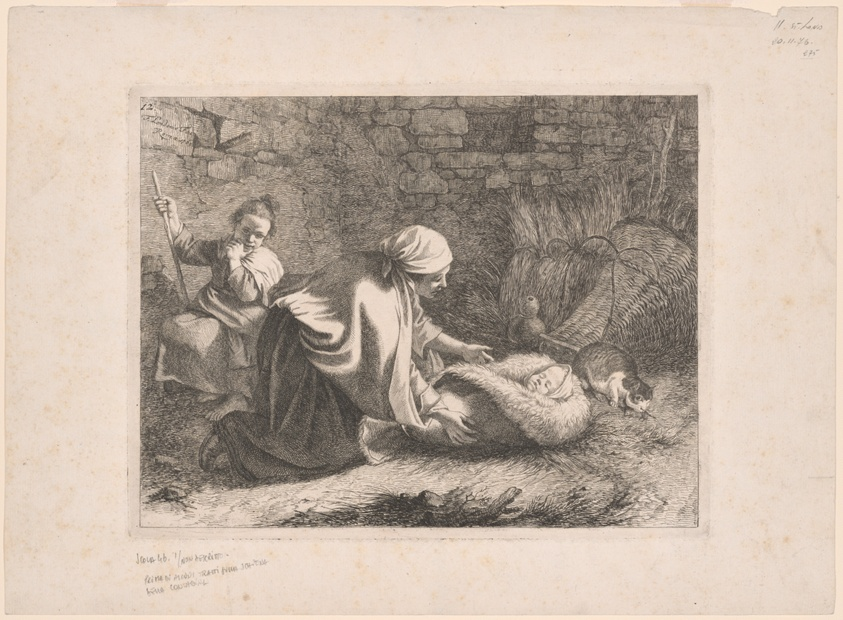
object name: Print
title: Plate 12, from The Set of 12 Pastorals Scenes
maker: Francesco Londonio (Italian, 1723-1783)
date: 1762-63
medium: Etching in black on ivory laid paper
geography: Italy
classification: print; etching; paper; prints and drawing